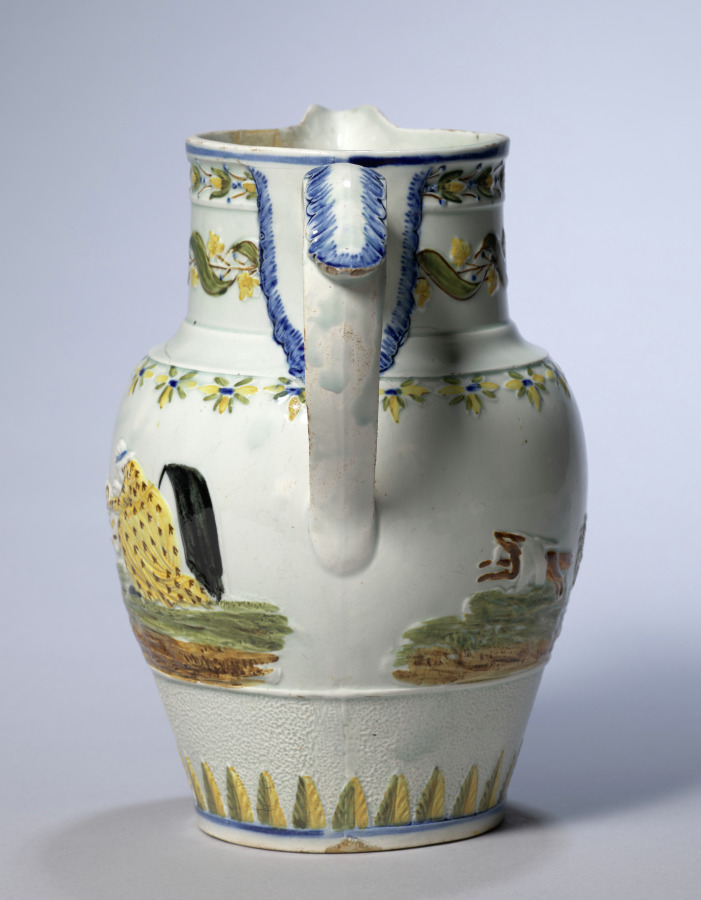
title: Jug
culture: England, Staffordshire, late 18th-early 19th Century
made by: Staffordshire Factory (British)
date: c. 1800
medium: earthenware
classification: Ceramic